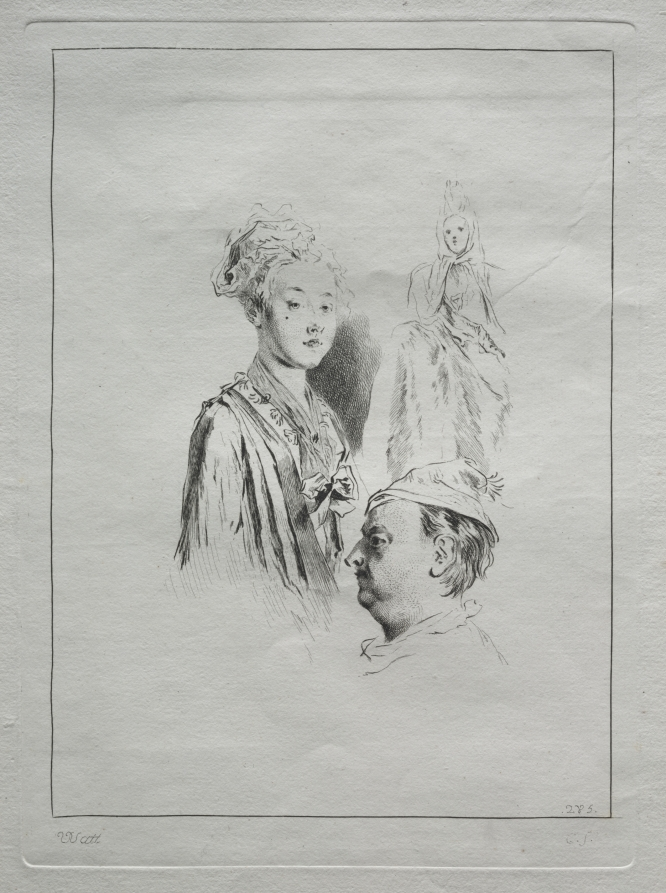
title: Study of Heads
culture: France, 18th century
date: 1700s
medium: etching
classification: Print